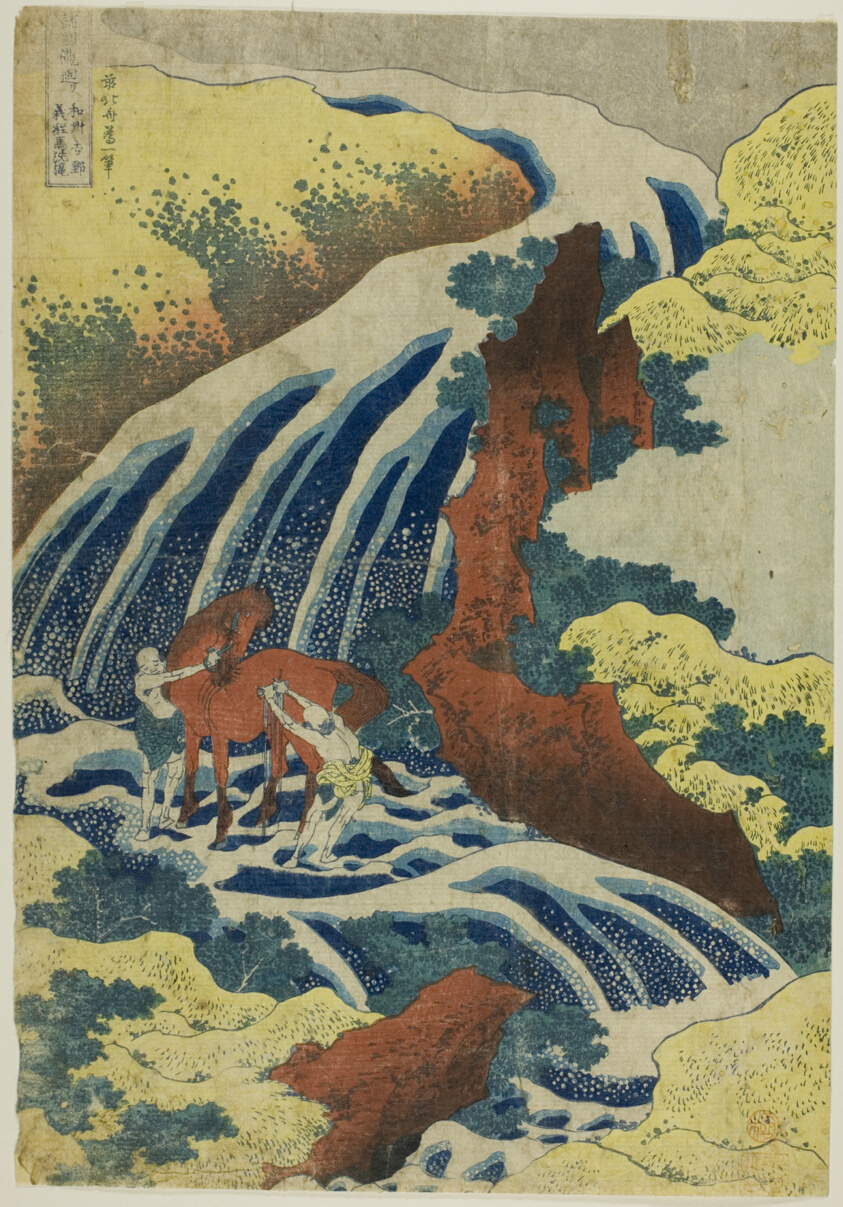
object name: Print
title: Yoshitsune's Horse-washing Falls at Yoshino in Yamato Province (Washu Yoshino Yoshitsune uma arai no taki) from the series "A Tour of Waterfalls in Various Provinces (Shokoku taki meguri)"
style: Japanese (culture or style)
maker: Katsushika Hokusai 葛飾 北斎; Japanese, 1760–1849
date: c. 1833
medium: Color woodblock print; oban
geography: Japan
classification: woodblock print; print